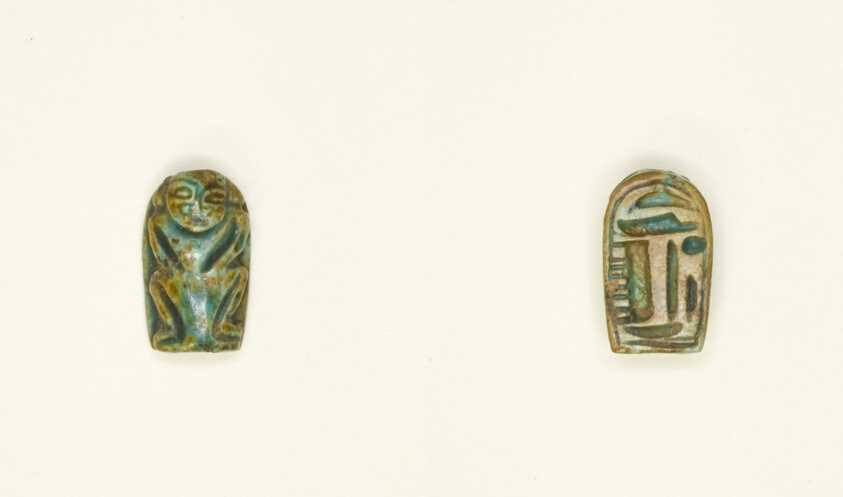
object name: Costume and Accessories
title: Scaraboid: Dwarf Figure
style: new kingdom, egyptian, ancient, ramesside period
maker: Egyptian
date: New Kingdom, Dynasties 19–20 (about 1295–1069 BCE)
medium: Glazed steatite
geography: Egypt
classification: scaraboids; amulet; ancient art; costume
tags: deities, gods (deities), Hieroglyphs